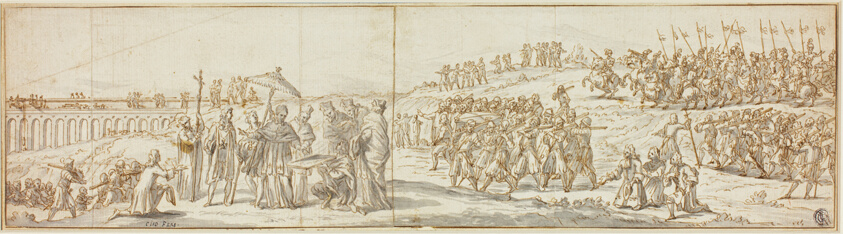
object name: Drawing and Watercolor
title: Pope Visiting Construction Site of a Bridge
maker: Possibly attributed to Ciro Ferri (Italian, 1634-1689); or an Unknown Italian Artist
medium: Pen and brown ink, with brush and gray wash, over traces of black chalk, on ivory laid paper, pieced and laid down on cream laid paper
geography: Italy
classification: drawings (visual works); prints and drawing